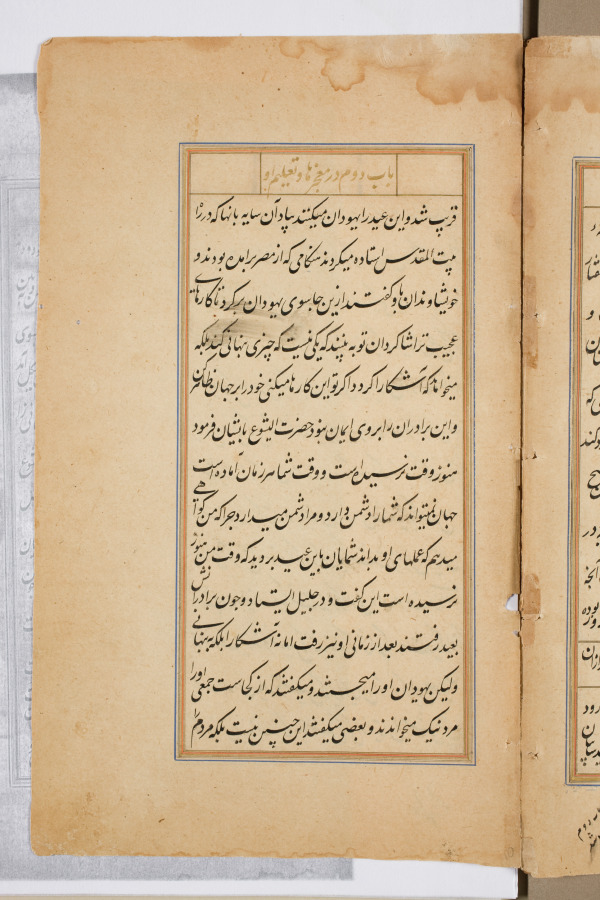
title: Text page from a Mirror of Holiness (Mir’at al-quds) of Father Jerome Xavier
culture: Mughal India, Allahabad, made for Prince Salim (1569–1627)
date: 1602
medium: Ink and gold on paper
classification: Manuscript